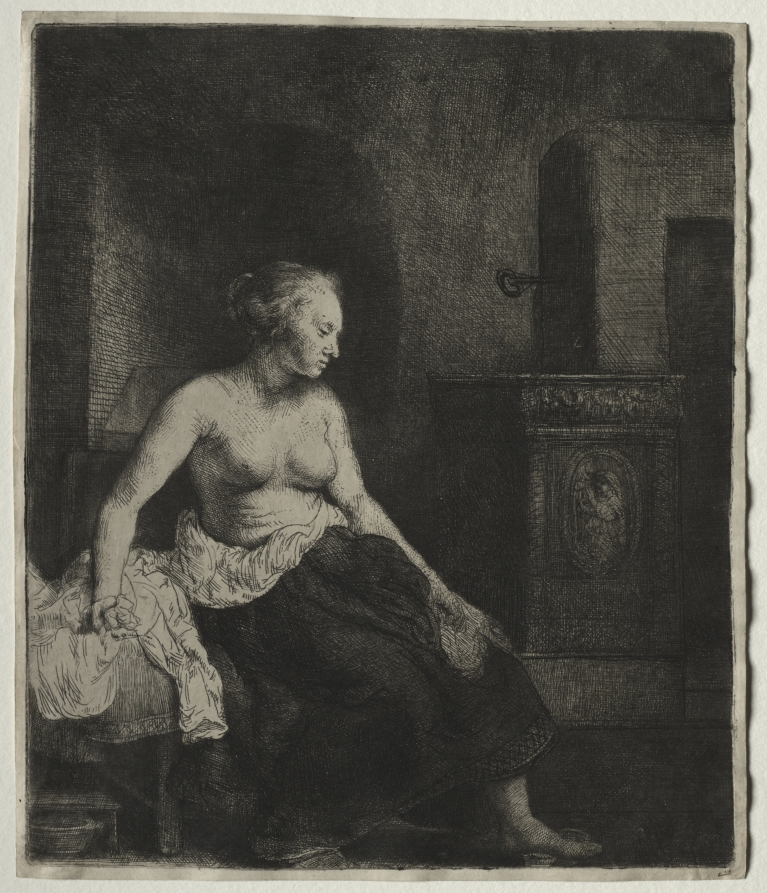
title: Woman Sitting Half Dressed Beside a Stove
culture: Netherlands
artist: Rembrandt van Rijn (Dutch, 1606–1669)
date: 1658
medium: etching and drypoint with surface tone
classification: Print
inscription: upper right, in plate: Rembrandt f. 1658 ; lower right, in pen and brown ink: [check mark] ; VERSO, upper left, in pen and brown ink: Aa ; upper right, in graphite: a [l?] ; upper center, in graphite: [L?] ; lower left, in graphite: [illegible inscription] ; lower left, in graphite: A 9[v?]583 ; lower left, in graphite: [f?] 1815 ; lower center, in graphite: 1520/15[upside down] ; lower left, in graphite: FPOx ; lower left, in graphite: 7